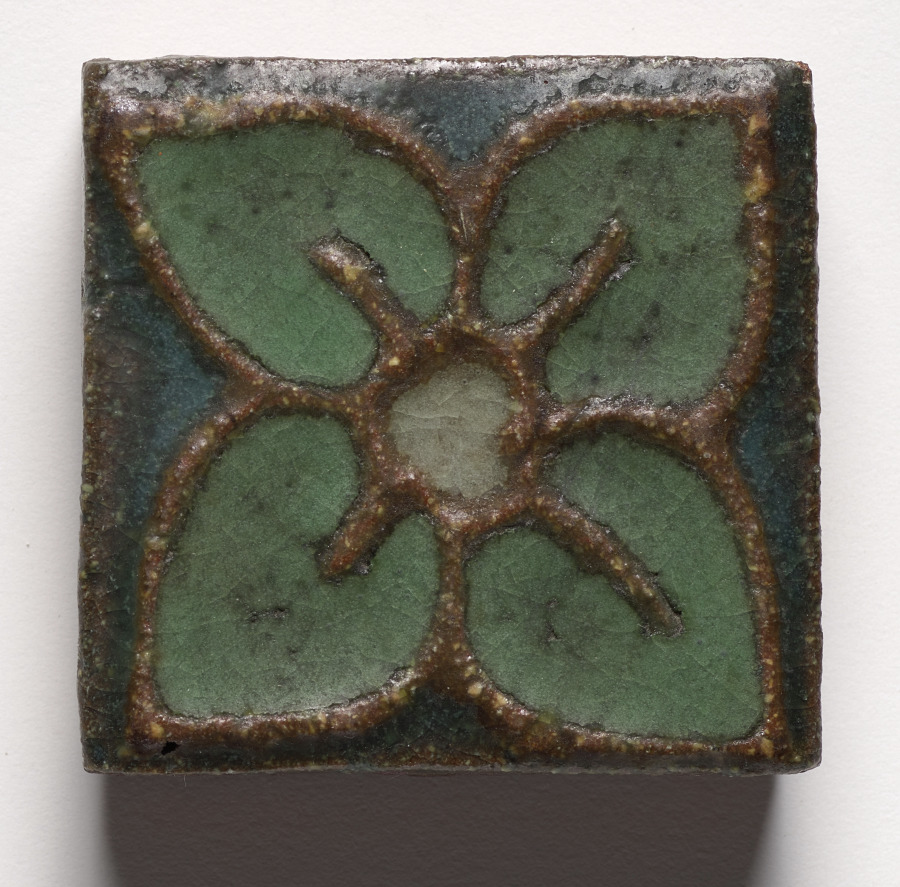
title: Tile- Flower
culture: America, Massachusetts, Boston, Early 20th century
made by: Grueby Pottery Company (American)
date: before 1920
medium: glazed ceramic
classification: Ceramic